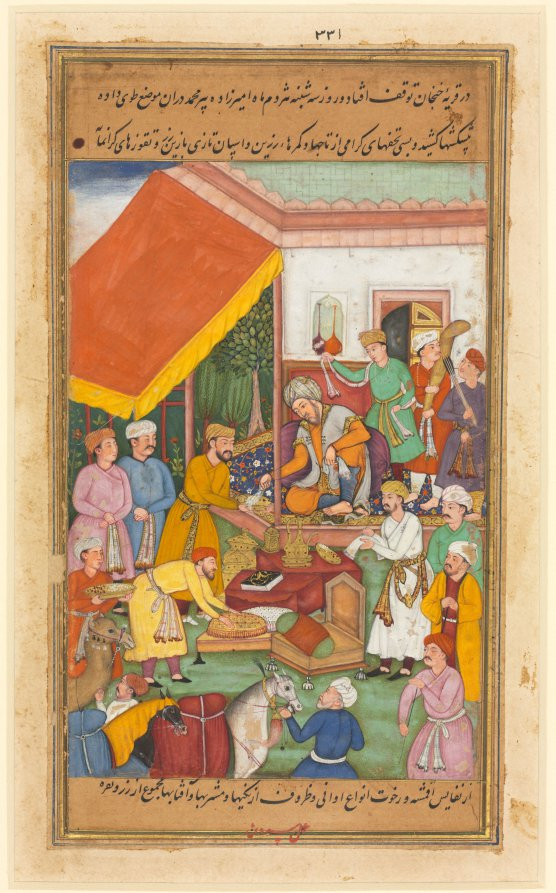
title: Timur distributes gifts from his grandson, the Prince of Multan, from a Zafar-nama (Book of Victories)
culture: Mughal India, court of Akbar (reigned 1556–1605)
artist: Shravana (Indian, active 1550s–c.1600)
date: 1598–1600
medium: Gum tempera, ink, and gold on paper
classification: Painting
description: The Turkic conqueror Timur (1336–1405) is the Mughal emperor Akbar’s most celebrated paternal ancestor. He sits on a terrace, shaded by a crimson awning. The blue carpet with gold border marking his high status is covered with a floral vine pattern that became fashionable in the 1500s. This scene takes place in a territory governed by Timur’s grandson, who sent him gifts of horses, camels, and a variety of luxury items. Timur is in the process of regifting them to members of his entourage in accordance with their merits.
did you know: Pre-modern giftwrap: Round textiles cover presentation platters.